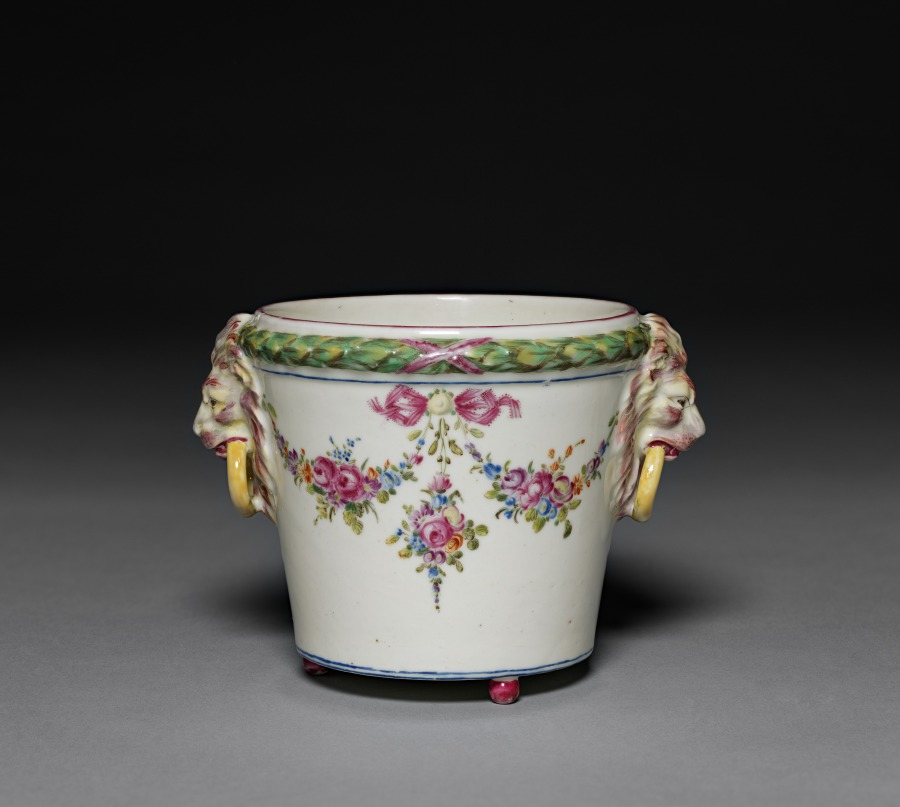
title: Cachepot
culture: France, Bourg-la-Reine, 18th century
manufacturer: Bourg-la-Reine Factory (French)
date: c. 1775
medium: soft-paste porcelain with enamel decoration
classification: Ceramic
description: The mark on this piece indicates that it was made after the Mennecy factory was moved to Bourg-la- Reine in 1773. The tradition of Mennecy's decoration on soft-paste porcelain can be recognized in the piece, but its style has been modified in response to the emerging neo-classic taste. The flowers are now organized into formal garland's and motifs of classical origin, such as the lion's heads, are introduced.